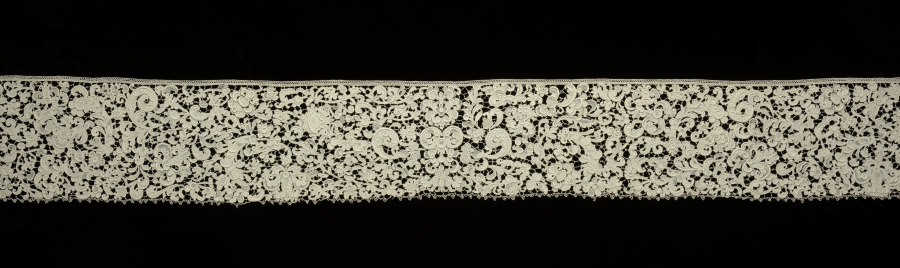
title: Lace Flounce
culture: Italy, Venice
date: 1600s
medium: Linen: needle lace (Venetian raised point)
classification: Lace